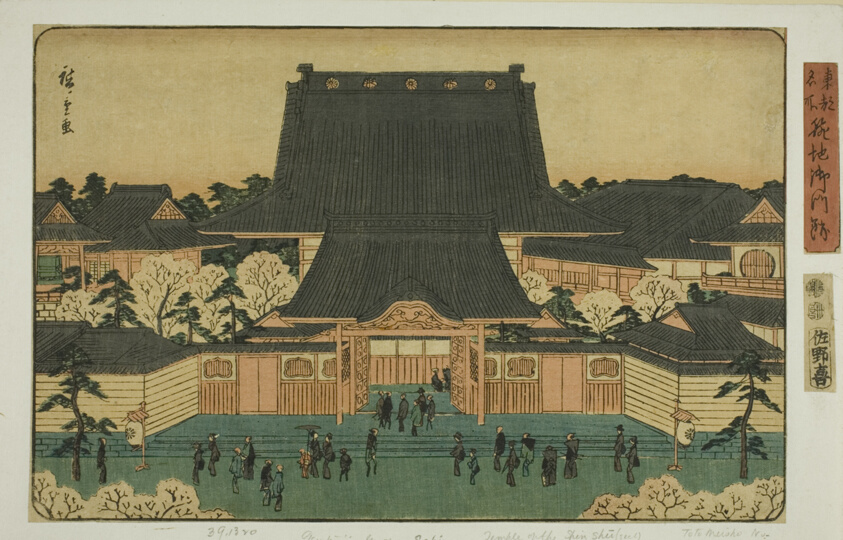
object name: Print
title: Gomonzeki at Tsukiji (Tsukiji Gomonzeki), from the series "Famous Places in the Eastern Capital (Toto meisho)"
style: Japanese (culture or style)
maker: Utagawa Hiroshige 歌川 広重; Japanese, 1797-1858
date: c. 1847/52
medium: Color woodblock print; oban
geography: Japan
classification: woodblock print; print; asian art